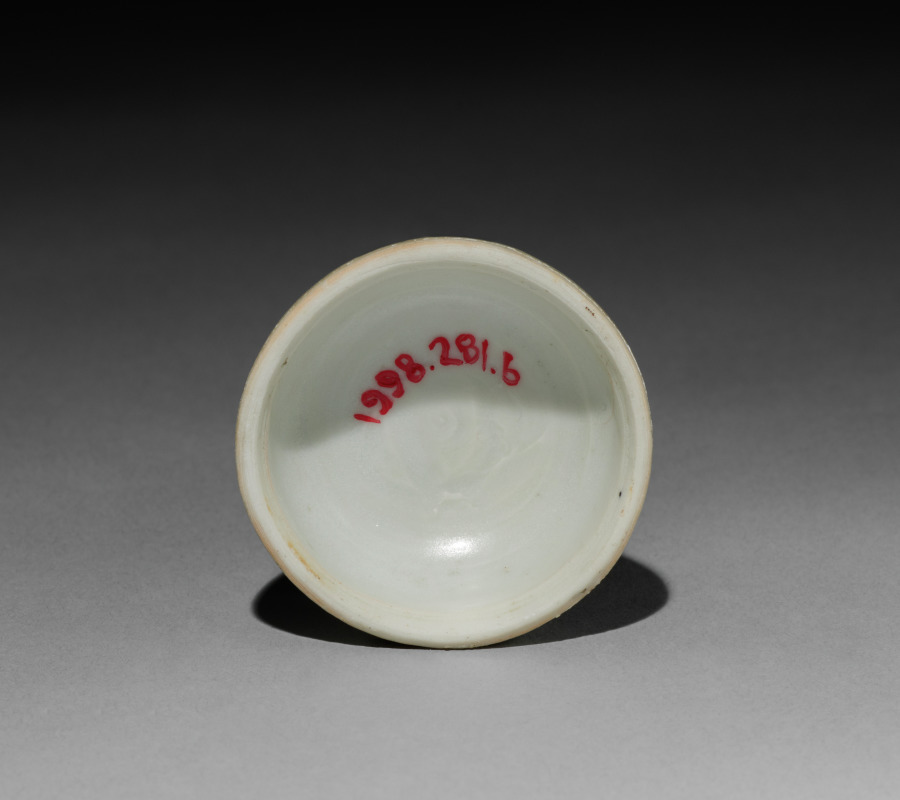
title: Pill Box (lid)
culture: China, Qing dynasty (1644-1911)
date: c. 1752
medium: porcelain with blue and white decoration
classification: Ceramic